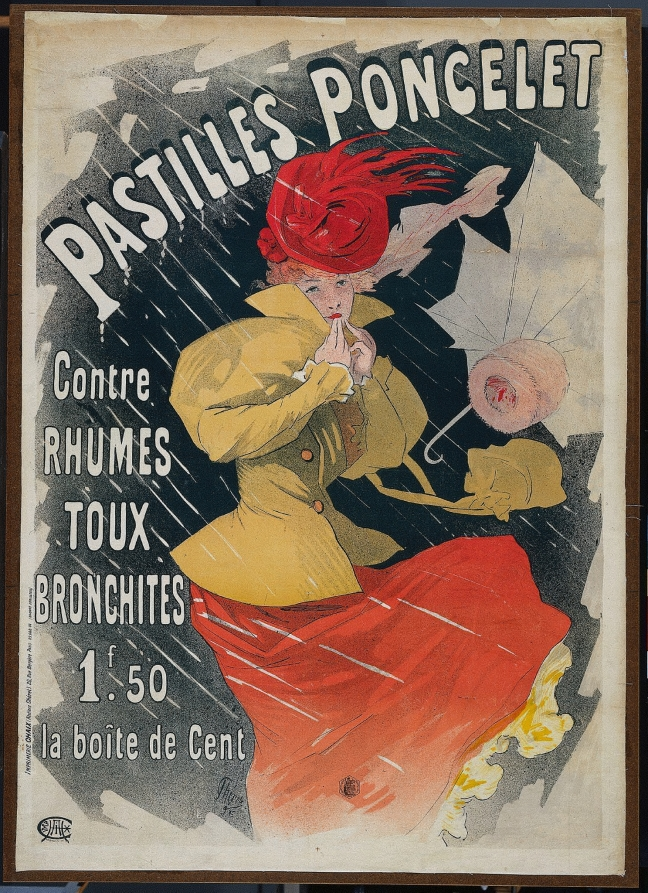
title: Pastilles Poncelet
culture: France, 19th century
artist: Jules Chéret (French, 1836–1932)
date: 1896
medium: color lithograph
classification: Print